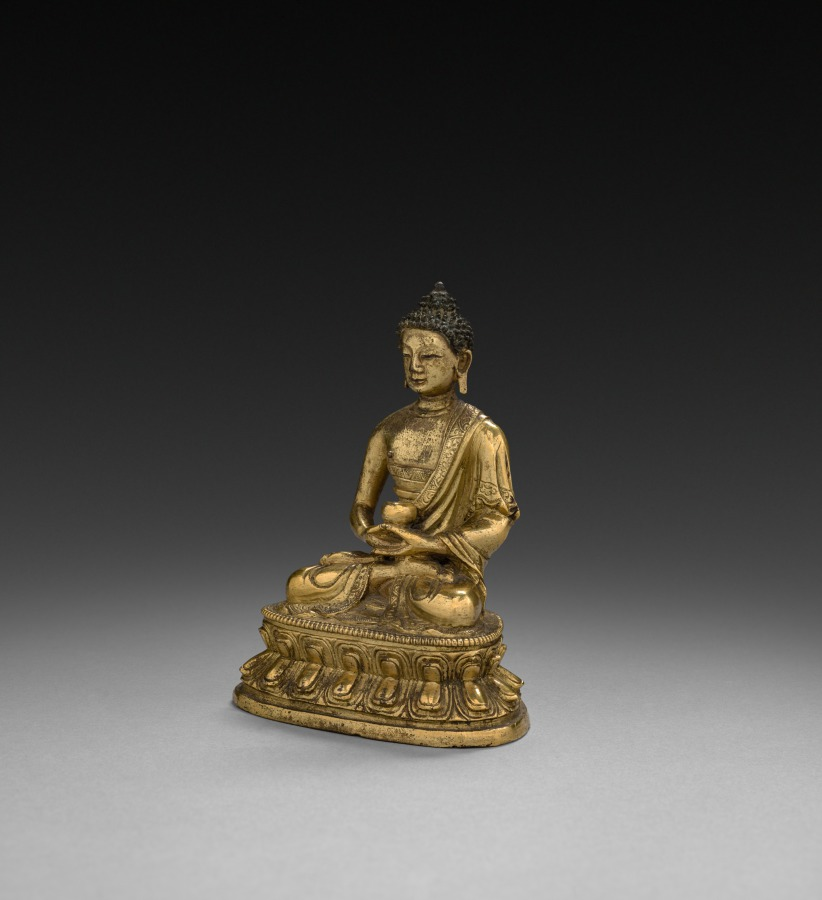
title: Seated Buddha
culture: China, Ming dynasty (1368–1644)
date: 1500s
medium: gilt bronze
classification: Sculpture